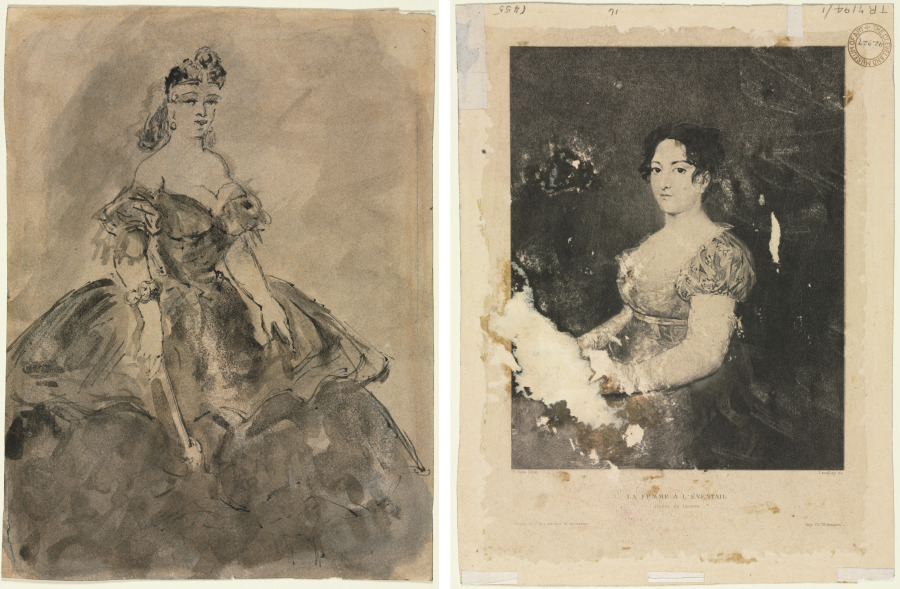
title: At the Ball (recto); La femme à l'éventail, after Goya (verso)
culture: France, 19th century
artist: Constantin Guys (French, 1805–1892)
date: 19th century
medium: pen and black ink and brush and gray wash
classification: Drawing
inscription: VERSO, lower right, in graphite: 16 ; lower right, in graphite: (455